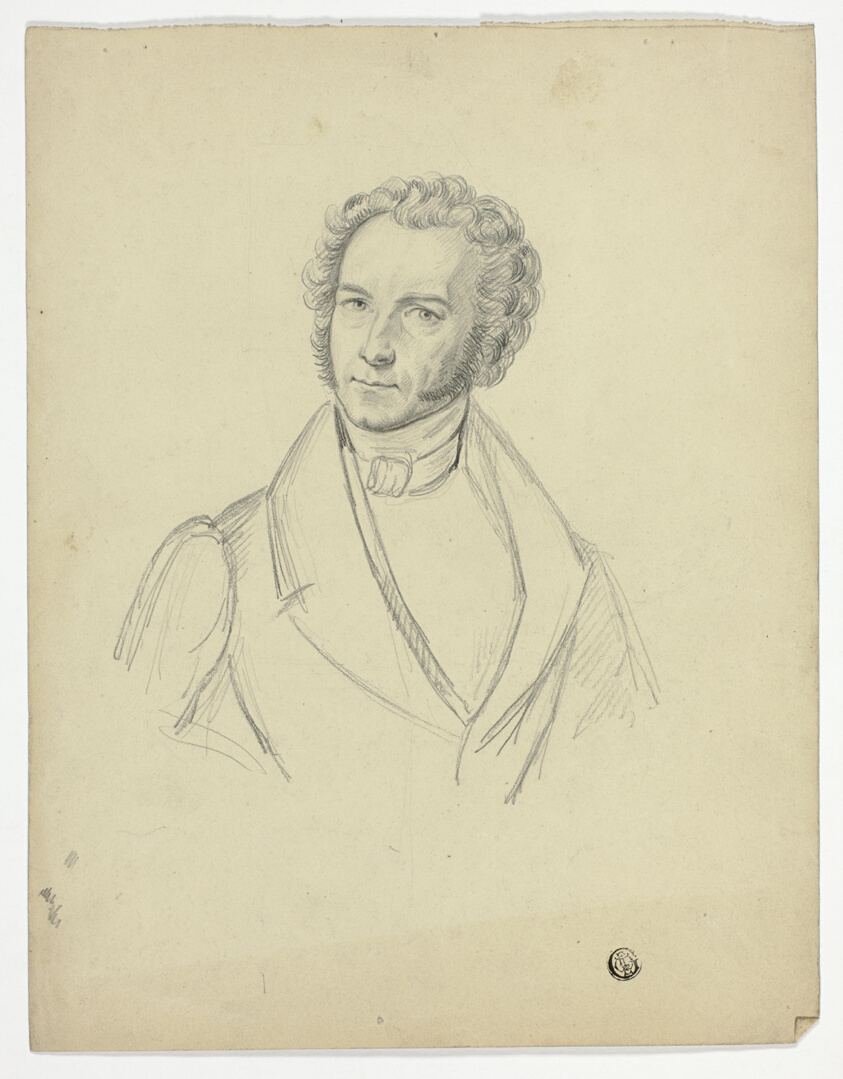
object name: Drawing and Watercolor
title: Dr. Moriard, Defender of Louis Napoleon During Reign of Louis Phillipe I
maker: Unknown Artist; French, 1800-1899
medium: Graphite on cream wove paper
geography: France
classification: graphite; drawings (visual works); prints and drawing